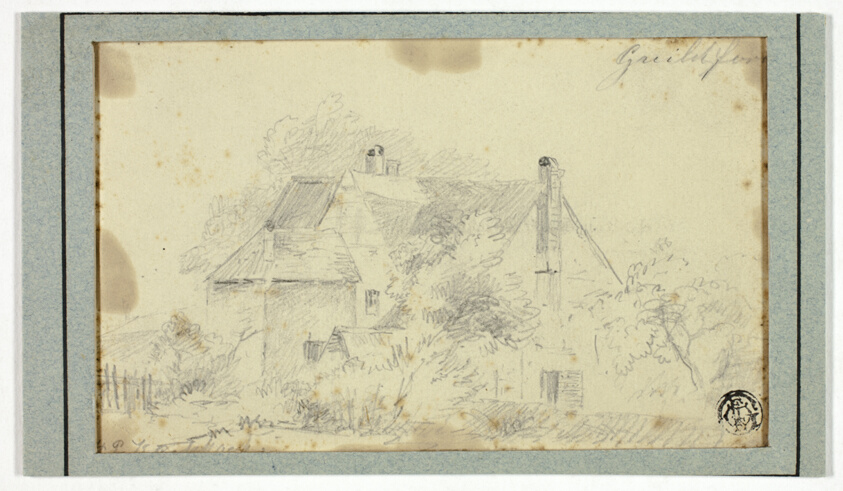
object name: Drawing and Watercolor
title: Guildford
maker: Hendrik Pieter Koekkoek (Dutch, 1843-c. 1890)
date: c. 1877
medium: Graphite on cream wove paper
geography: Holland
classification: graphite; drawings (visual works); prints and drawing